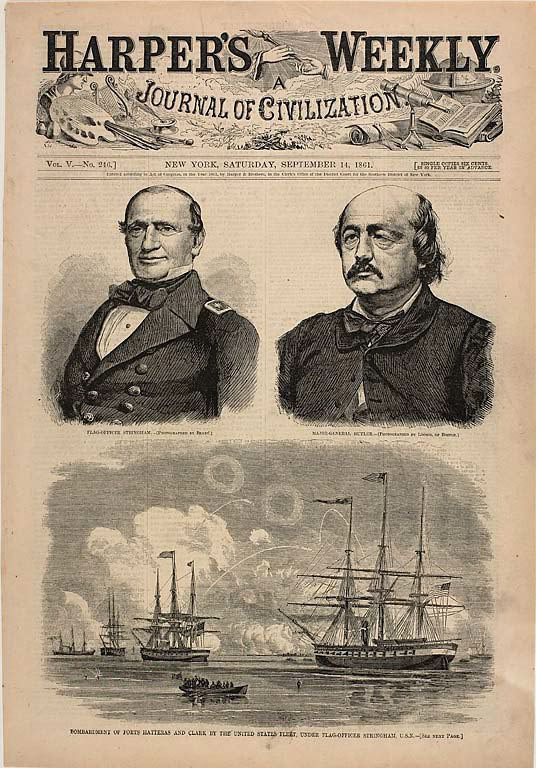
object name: Print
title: Flag Officer Stringham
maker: Winslow Homer (American, 1836-1910); published by Harper's Weekly (American, 1857-1916)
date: published September 14, 1861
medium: Wood engraving on paper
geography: United States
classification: wood engraving; print; prints and drawing